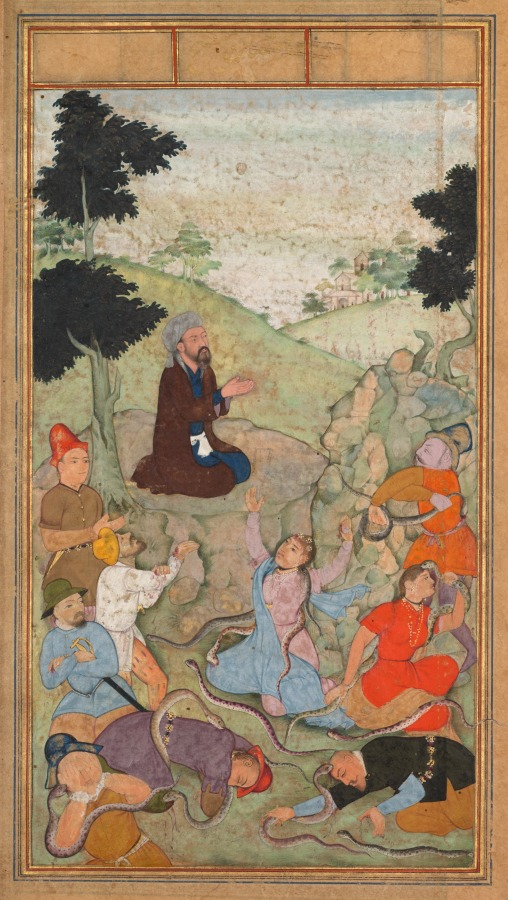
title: Moses praying to end the serpents’ attack on the Israelites (folio 63 verso), from a Mirror of Holiness (Mir’at al-quds) of Father Jerome Xavier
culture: Mughal India, Allahabad, made for Prince Salim (1569–1627)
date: 1602–4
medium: Gum tempera, ink, color, and gold on paper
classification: Manuscript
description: After the Israelites complained about the difficulties of their journey out of Egypt, God punished them for their lack of gratitude by sending snakes to bite and plague them. Apparently reveling in the brutality of the scene, the artist shows men and women alike being savaged by snakes, one of whose tail slithers over the rulings of the right margin. An Israelite woman raises her hands and pleads with Moses to help them, promising repentance, and he intercedes on their behalf. Father Jerome used this episode to demonstrate how repentant believers merit salvation.